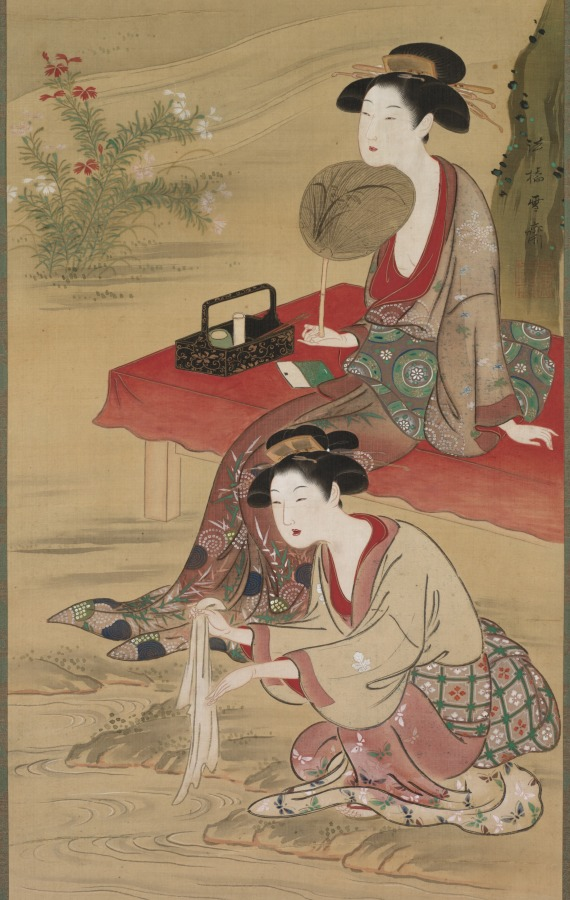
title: Beneath the Willow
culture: Japan, Edo period (1615–1868)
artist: Tsukioka Sessai (Japanese, d. 1839)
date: after 1778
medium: Hanging scroll; ink and color on paper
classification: Painting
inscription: Signed: Bridge of the Law Sessai (Hokyo Sessai). Sealed: Sessai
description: Two young women cool themselves by a river as a willow blows in the breeze. One crouches down to rinse a hand towel, while the other sits with her chin balanced on her fan. Beside her is a black lacquer tray with a floral design in gold, holding her tobacco kit. Tsukioka Tessai was an Osaka-based ukiyo-e artist who was especially respected for his representations of beautiful women (bijin). The court bestowed upon him the rank Bridge of the Law (hokyo) in 1778, and he was eventually elevated in rank to Eye of the Law (hogen).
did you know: The willow tree may refer to the contemporary Edo fashion for elongated "willowy" beauties.